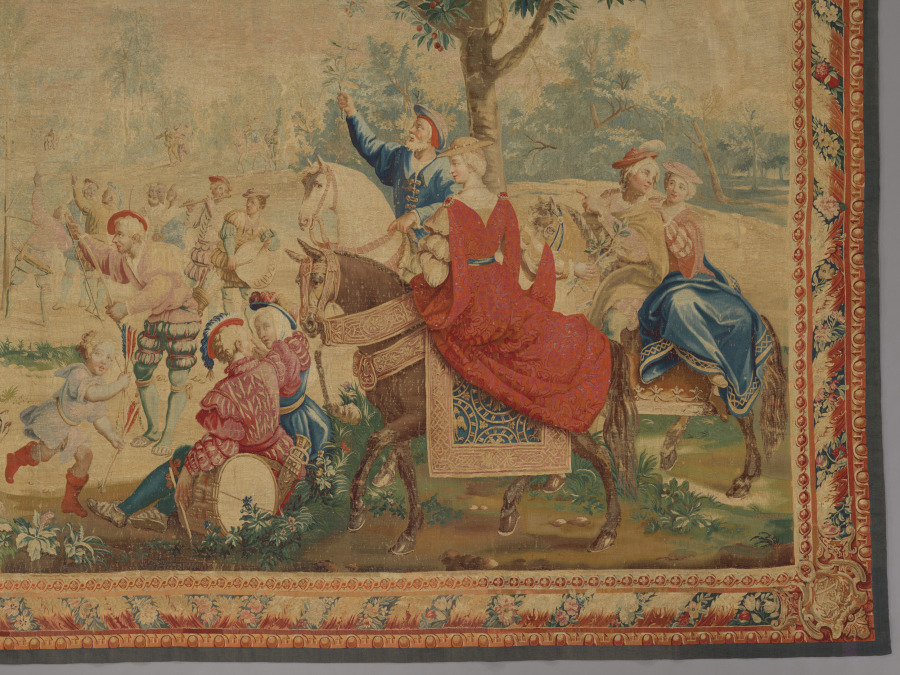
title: Month of May: Scene of May Day Festival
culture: France, 18th century, Period of Louis XV (1723-1774)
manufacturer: Gobelins Manufactory (France, Paris, est. 1662)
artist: Michel Audran (French, 1701–1771)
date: 1723–1774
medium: tapestry weave: linen warp, wool and silk wefts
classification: Tapestry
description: Seated spectators and splendidly clothed ladies and gentlemen on horseback watch May Day festivities in this tapestry. In the middle distance, archers prepare to shoot at a bush and bird placed atop a maypole, while more spectators congregate in the receding landscape. A border of rolled acanthus leaves and flower garlands frames the scene. This scene is one of twelve so-called Months of Lucas tapestries, each depicting activities that coincide with a month of the year. The original “Months of Lucas” was a sixteenth-century Flemish tapestry set that was owned by the French monarchy and mistakenly attributed to Lucas van Leyden during the 1600s. To this day, they continue to be known as the “Months of Lucas.” This original set was burned in 1797 so their gold and silver metal threads could be used to replenish the depleted French coffers. Beginning in the 1600s, the popular Months of Lucas were reproduced in several different versions under various masters at the Gobelins Manufactory in Paris, the famous royal production center for French tapestries since Louis XIV (1638–1715). The lower right hand corner of this tapestry bears the signature of Michel Audran (1701–1771), director of the Gobelins high-warp loom workshop from 1732–71, who produced this tapestry for a private patron in addition to the other royal commissions of the set.